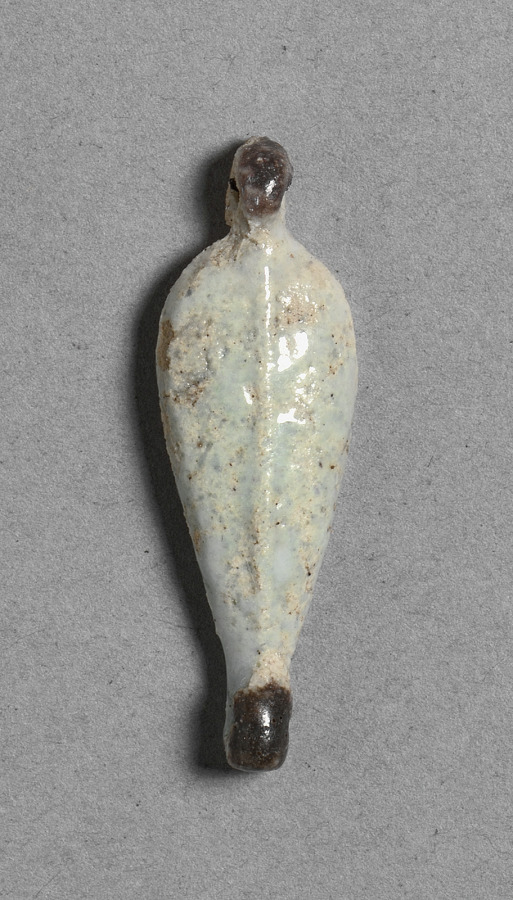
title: Petal-Shaped Bead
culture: Egypt, New Kingdom (1540–1069 BCE), Dynasty 18, reign of Amenhotep III (1390–1352 BCE)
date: c. 1391–1353 BCE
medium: faience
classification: Jewelry